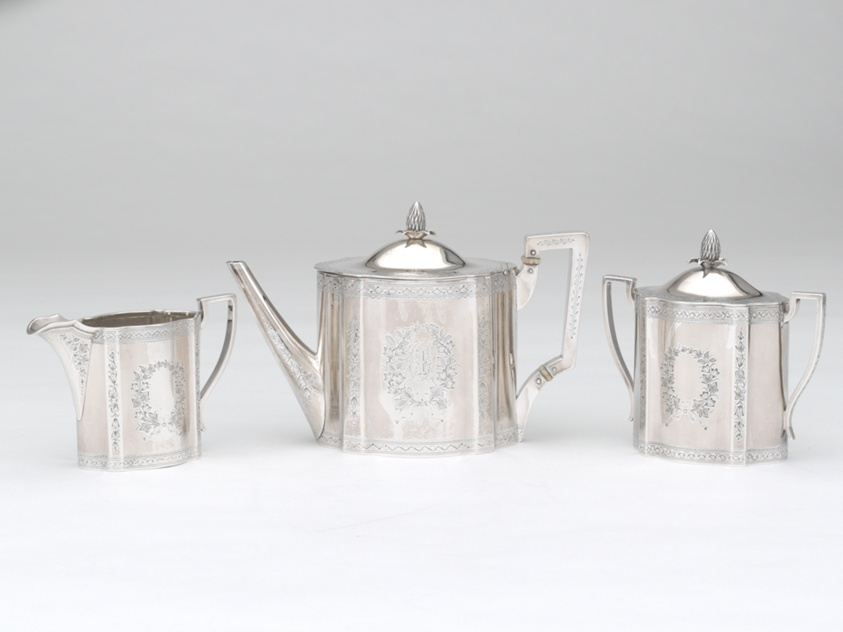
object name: Metalwork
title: Tea Service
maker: Haddock, Lincoln & Foss (American, 1859–1868); Boston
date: 1862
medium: Silver with ivory or ivorine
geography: Boston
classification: tea service; silver; american decorative arts; american arts; decorative arts